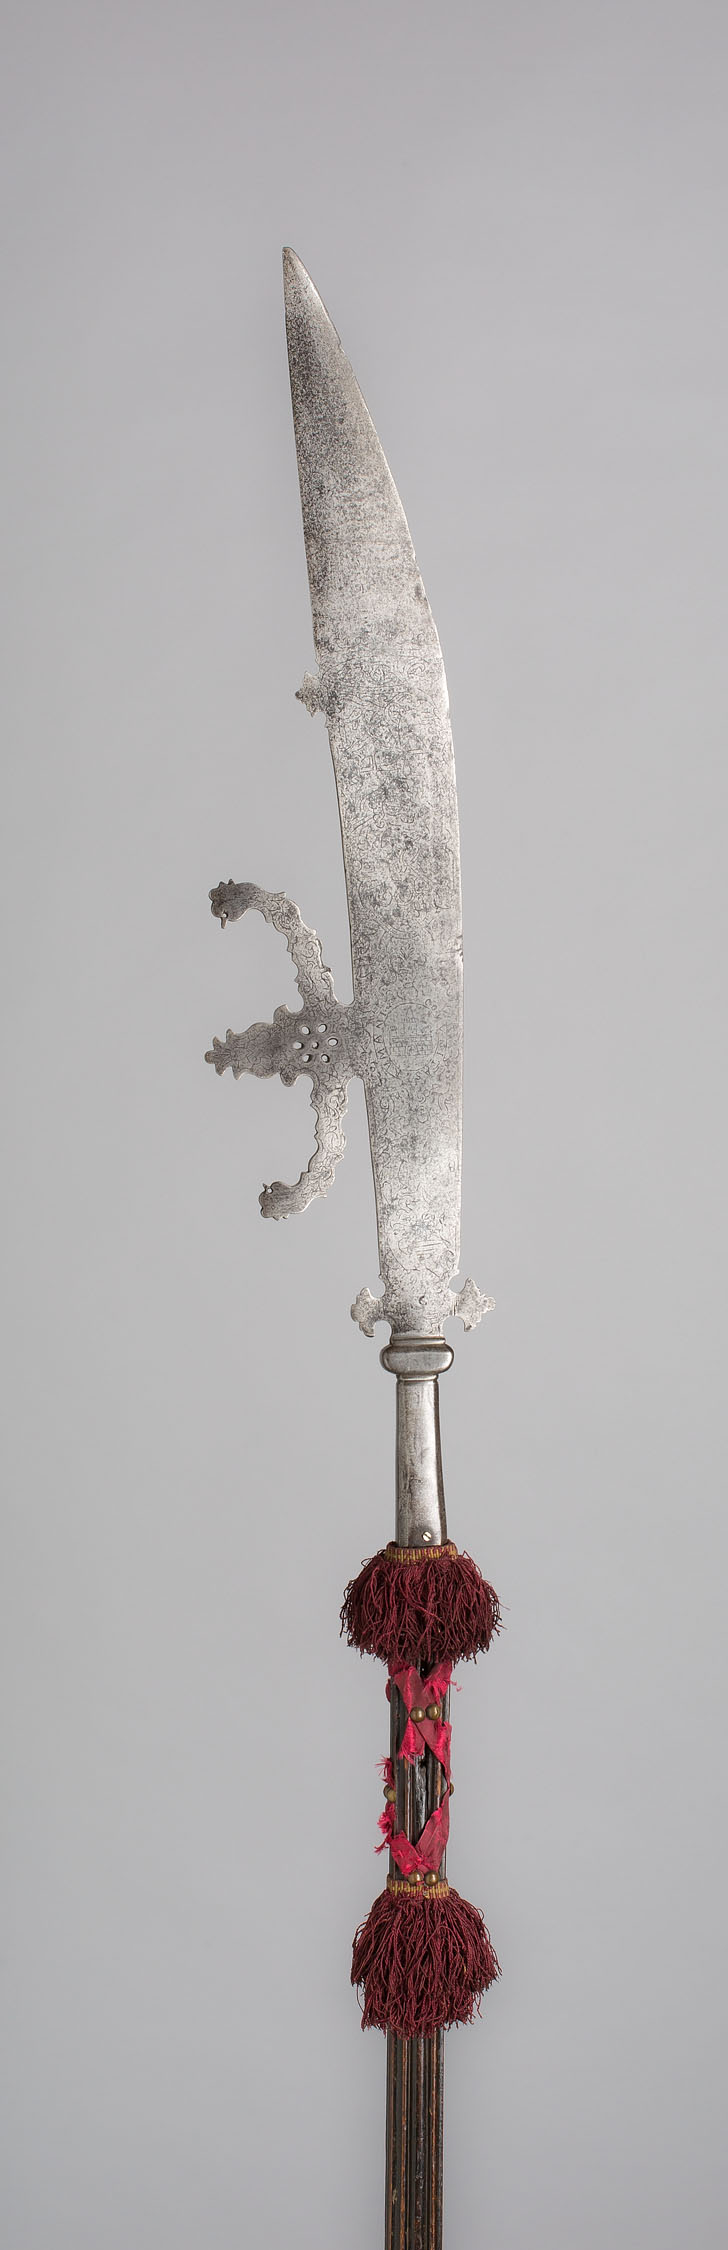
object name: Arms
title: Glaive for the Civic Guard of Rome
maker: Italian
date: 1600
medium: Steel, wood, and modern tassel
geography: Italy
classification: edged weapon-staff; arms; arms and armor